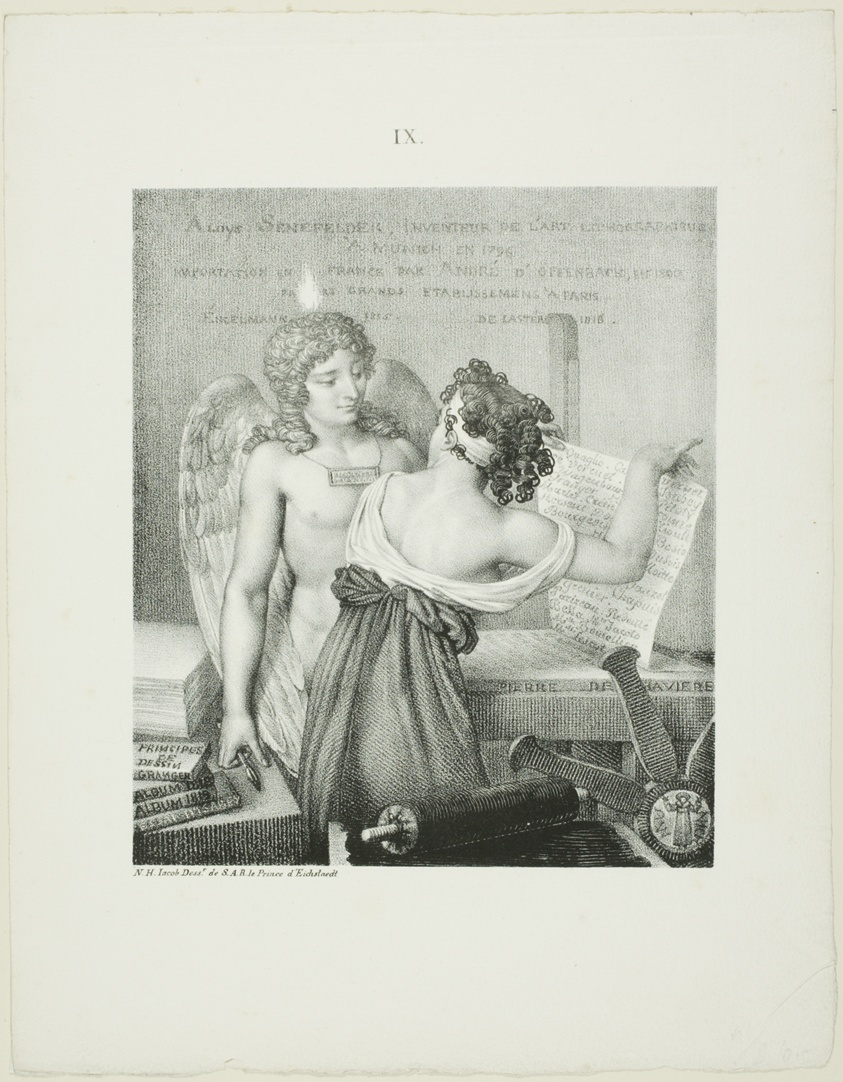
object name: Print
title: The Genius of Lithography, from Alois Senefelder’s L’Art de la lithographie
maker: Nicolas Henri Jacob (French, 1781–1871)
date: 1819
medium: Lithograph in black on ivory wove paper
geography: France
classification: lithograph; print; prints and drawing